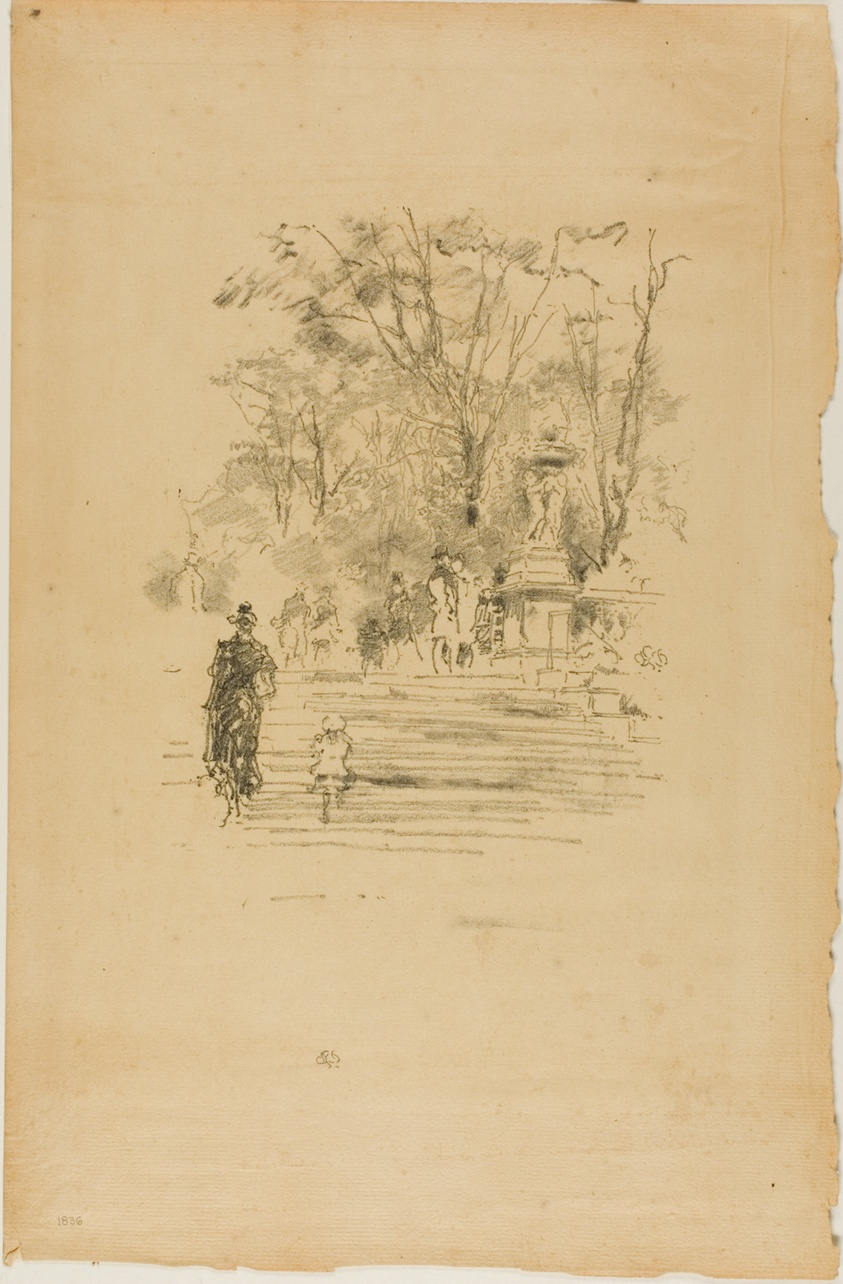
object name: Print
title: The Steps, Luxembourg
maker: James McNeill Whistler (American, 1834-1903)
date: 1893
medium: Transfer lithograph in black with stumping, on tan laid paper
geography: United States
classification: transfer lithograph; lithograph; print; prints and drawing; paper